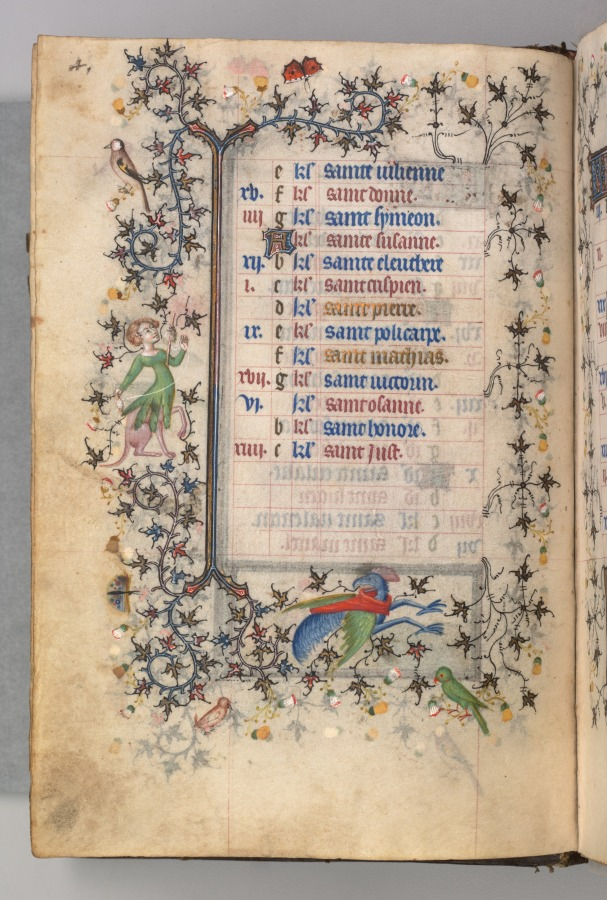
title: Hours of Charles the Noble, King of Navarre (1361-1425): fol. 2v, February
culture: France, Paris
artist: Master of the Brussels Initials and Associates (French)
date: c. 1405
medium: ink, tempera, and gold on vellum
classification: Bound Volume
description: This precious book was highly prized by its owner, Charles III, King of Navarre, a French-born prince whose coat of arms is painted on 20 folios. Charles visited Paris on numerous occasions and likely acquired this volume there in 1404. Paris was the center of the European book trade at the time and attracted illuminators from many parts of Europe. This manuscript represents one of the most remarkable fusions of French and Italian taste in book illumination. Though conforming to Parisian standards, most of the book’s major miniatures are the work of the Brussels Initials Master, an Italian illuminator who previously worked in Bologna and Padua.